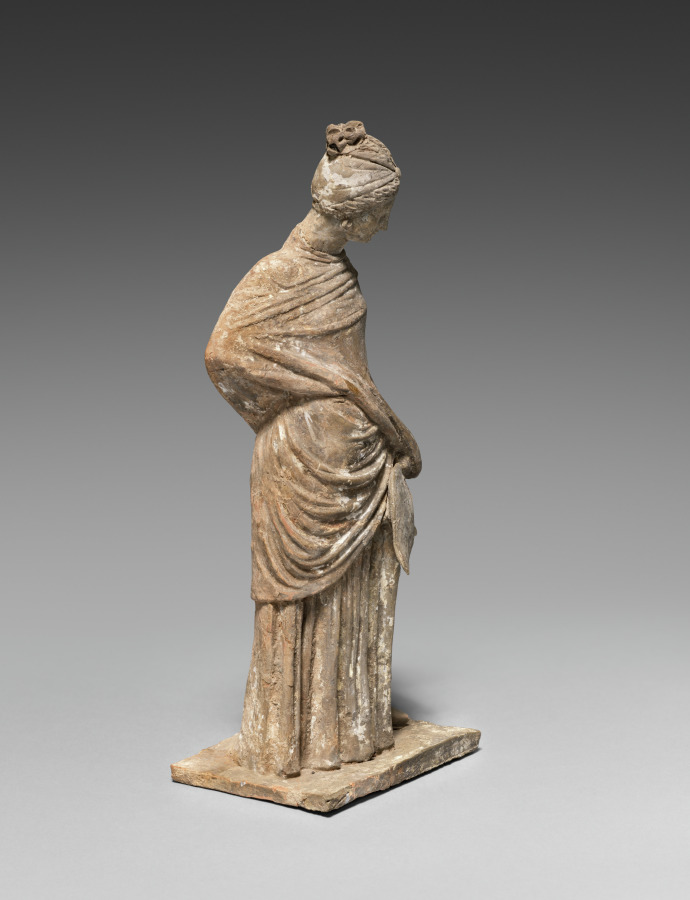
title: Figurine of a Lady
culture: Greece, Tanagra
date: 200s BCE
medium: terracotta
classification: Sculpture